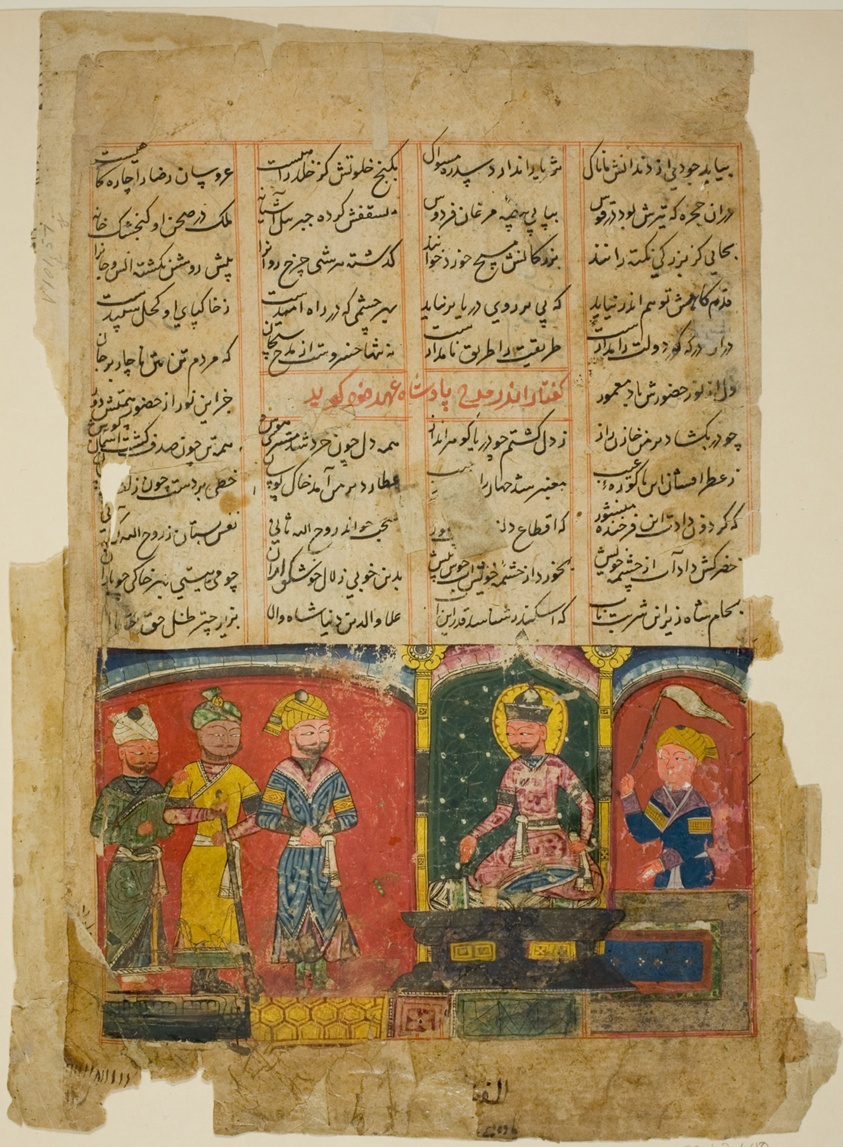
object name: Painting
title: Amir Khusrau Dedicates His Poem to Sultan Ala al-Din Khalji, page from the Quintet (Khamsa) of Amir Khusraw Dehlavi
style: Islamic (culture or style)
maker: India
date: Delhi Sultanate period (1206-1526) mid–15th century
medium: Opaque watercolor and ink on paper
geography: India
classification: miniature painting; painting; asian art